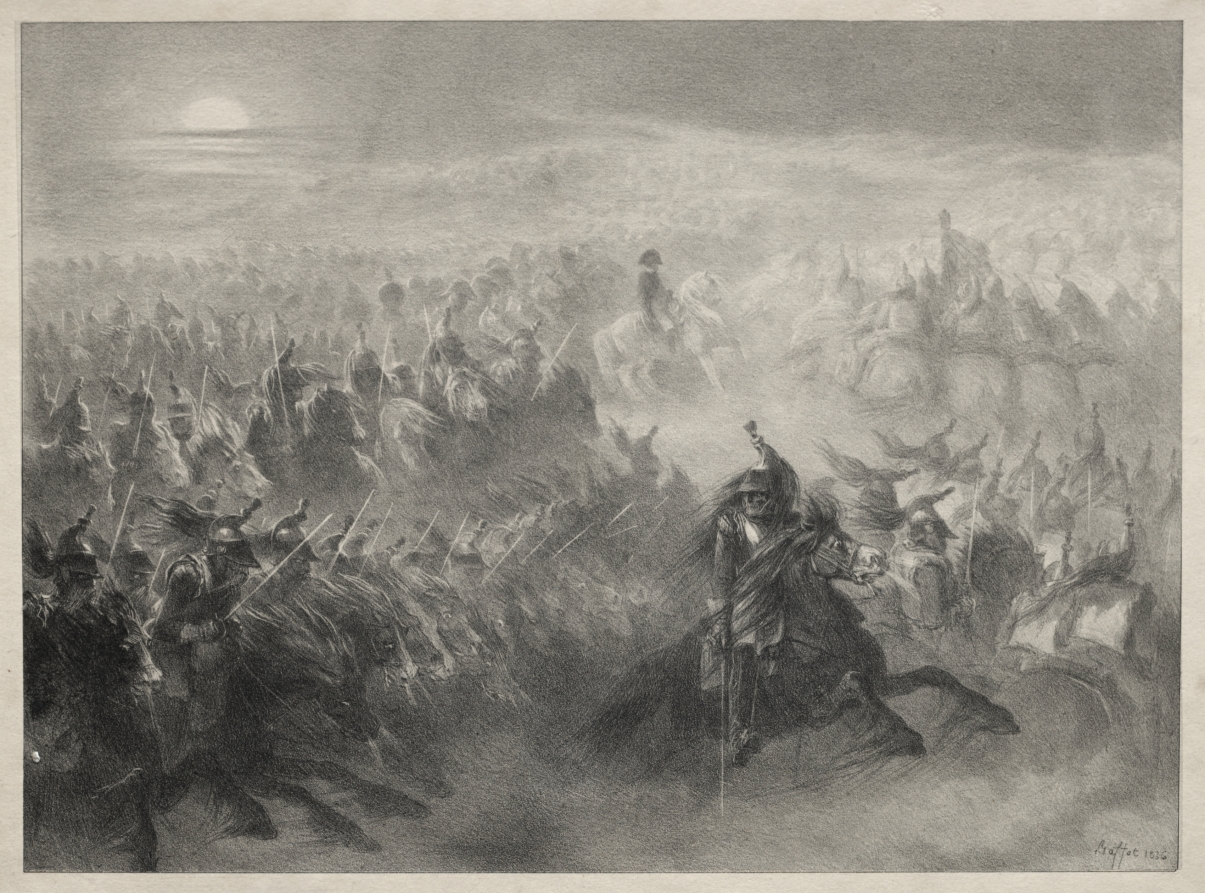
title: Review at Night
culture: France, 19th century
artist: Auguste Raffet (French, 1804–1860)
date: 1816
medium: lithograph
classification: Print